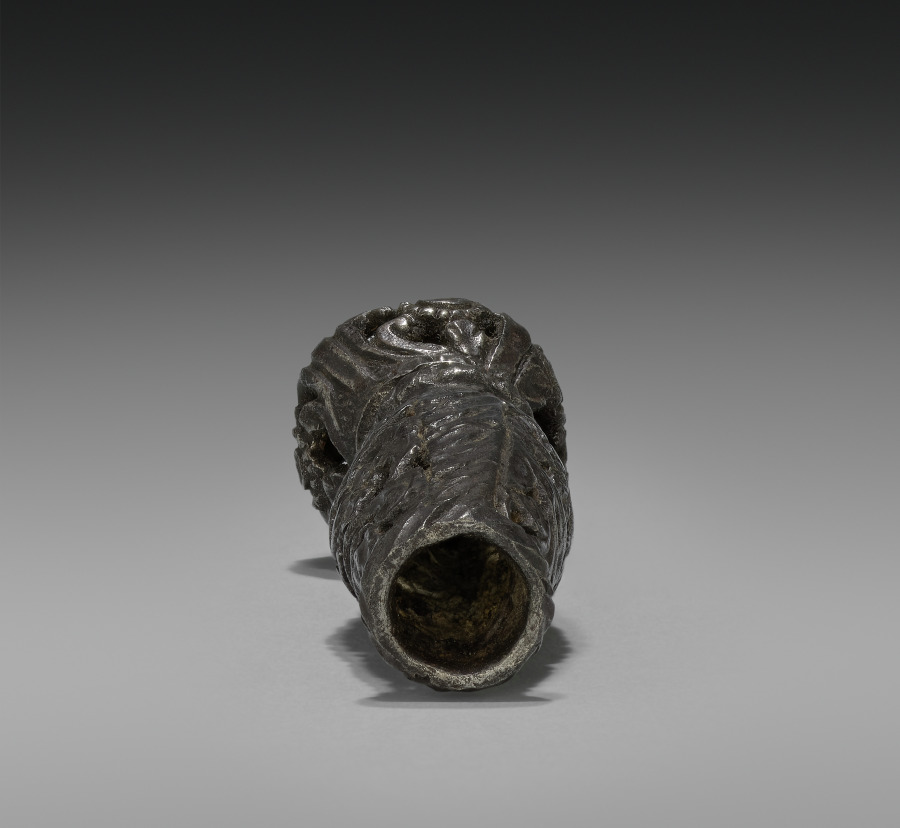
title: Pommel and Grip of Dress Sword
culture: Italy, 17th century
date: 1600s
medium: steel, chiseled, chased, and pierced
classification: Arms and Armor